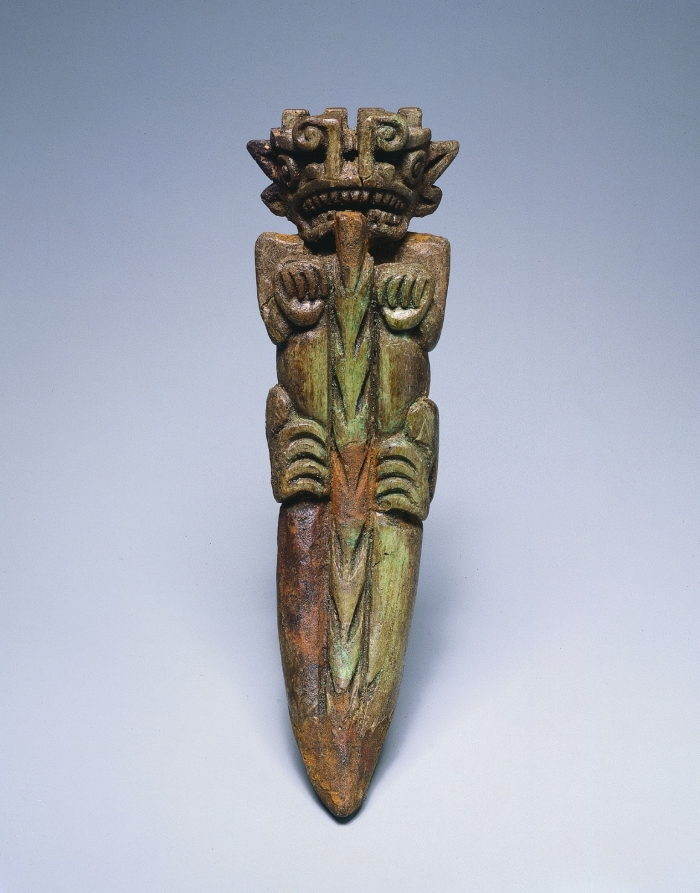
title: Ornament from Sitio Conte: Animal Pendant(?)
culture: Panama, Conte style, 5th - 10th century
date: c. 400–900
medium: manatee bone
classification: Jewelry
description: Harvard archaeologists excavated the eight ornaments in this case from several burials at Sitio Conte, a cemetery famous for its lavish graves of powerful chieftains. The young man buried in Grave 26 was such a chief. His status was stunningly memorialized by 21 human companions and 475 objects, many of them personal ornaments made of gold, including the large chest plaque (no. 2) and the rod-shaped ear ornament (no. 3) shown here. The creature on the chest plaque, found close to the chief’s body, has reptile claws and perhaps the head crest of an iguana. Its meaning is unknown but perhaps, as in later periods, reptilian imagery and the warm gleam of gold linked rulers with the sun’s creative force.